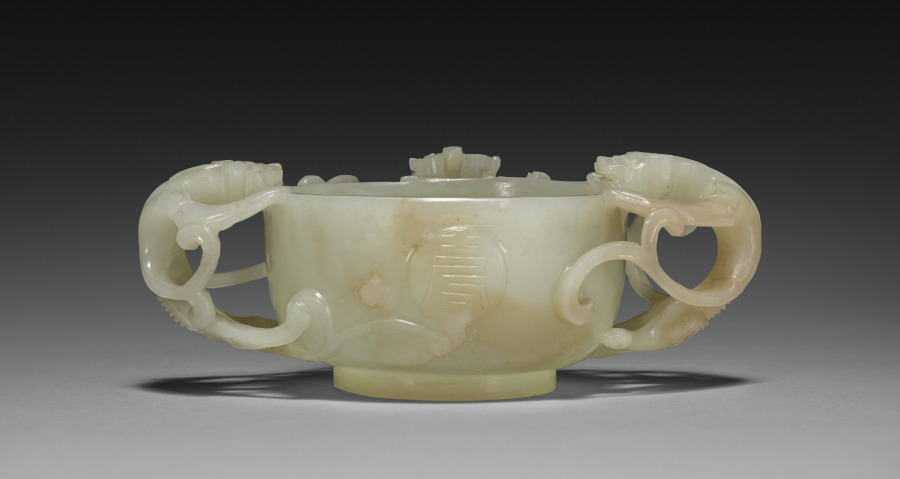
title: Cup with Dragon Handles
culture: China, Qing dynasty (1644-1911), Kangxi reign (1662-1722)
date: 1662–1722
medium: Pale gray-green white jade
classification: Jade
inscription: 萬壽長春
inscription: 壽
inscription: 子剛造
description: Three dragons, auspicious symbols for good fortune, grasp the rim of this bowl. A large shou (longevity) character is visible on the outside wall. Drinking cups with dragon handles were elite luxuries. The yellowish-white color and refined techniques are characteristic of Suzhou workshops that served the court, scholar-officials, and the merchant class. The optimistic attribution to Lu Zigang (late 1500s), a jade master recorded to have been active in Suzhou, suggests that its maker used the master’s name to attract wealthy clients eager to demonstrate their refined taste and connoisseurship.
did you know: Auspicious inscriptions on the base and front of the jade cup convey wishes for longevity.